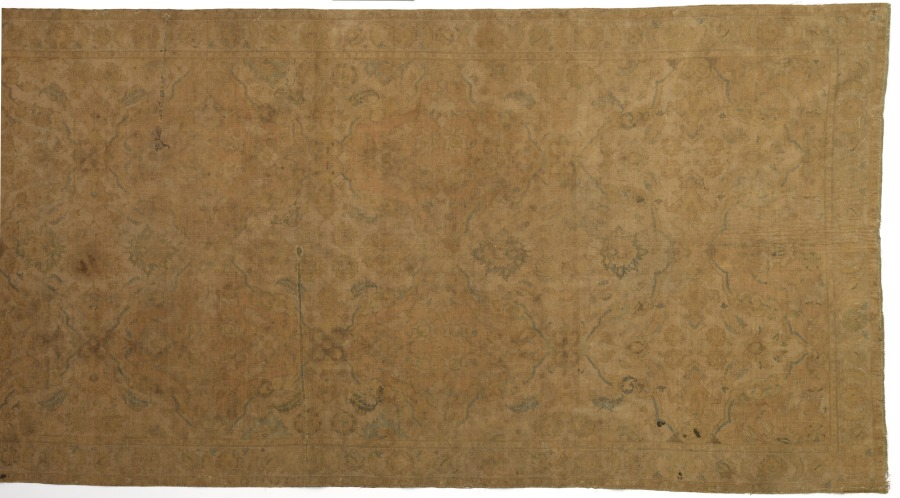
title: Carpet, so-called "Polonaise"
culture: Iran, 17th century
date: 17th century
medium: senna knot: silk, silver and gold filé brocading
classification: Carpet